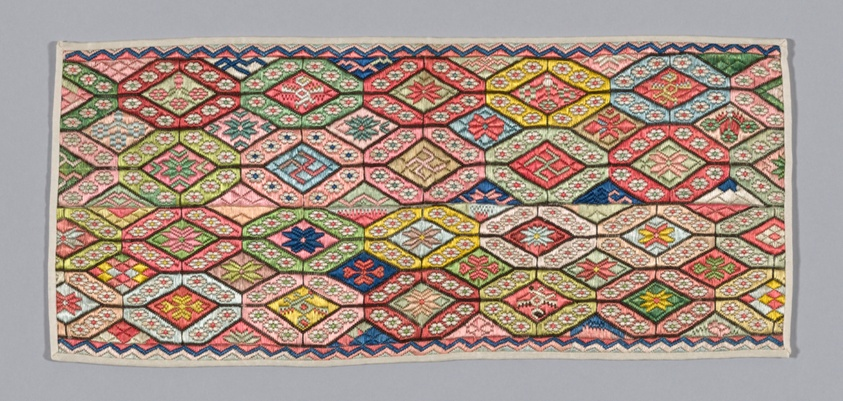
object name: Textile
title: Bands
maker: Han-Chinese (China)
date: Qing dynasty (1644–1911), 1875/1900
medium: Forty-four pairs and eight odd pieces of embroidered sleeve, ankle bands, etc. on gauze.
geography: China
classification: costume - embroidery; embroidery; textile